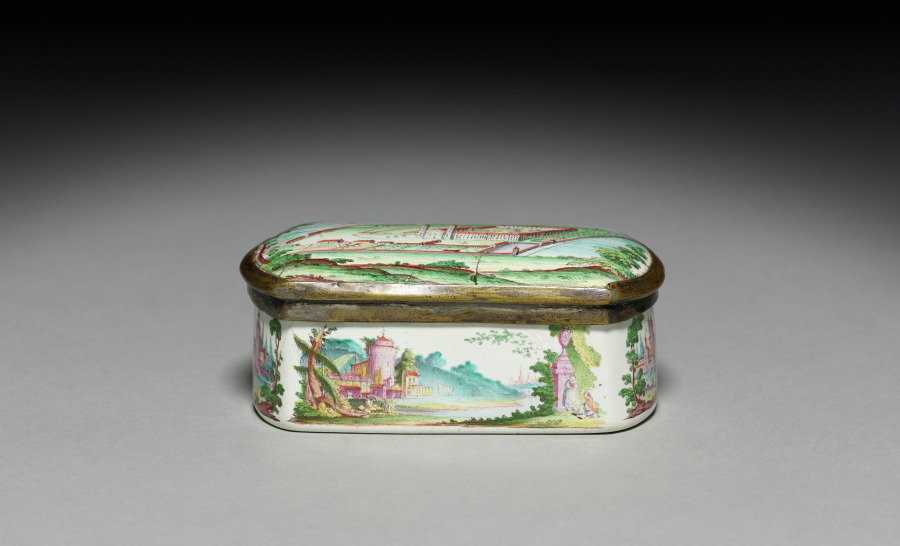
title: Snuff Box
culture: Austria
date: mid-1700s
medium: enamel on copper with metal mounts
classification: Miscellaneous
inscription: on interior of lid in a rococo cartouche: "S Hieronimus."